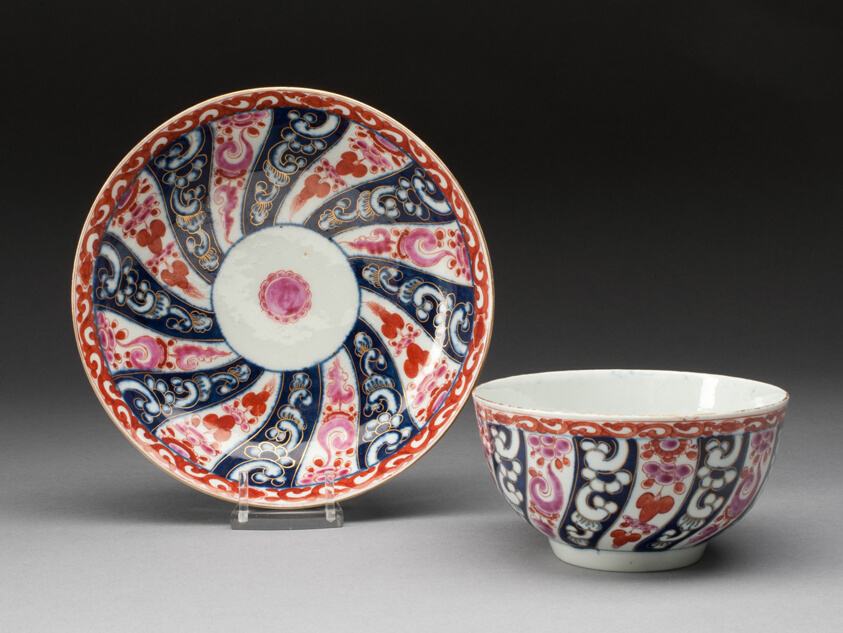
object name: Ceramics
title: Tea Bowl and Saucer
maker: Worcester Porcelain Factory (Warmstry House Period, 1751–1783); Worcester, England, founded 1751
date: c. 1770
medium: Soft-paste porcelain, polychrome enamels and gilding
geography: Worcester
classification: drinking vessel; teaware; porcelain; european decorative arts; ceramics